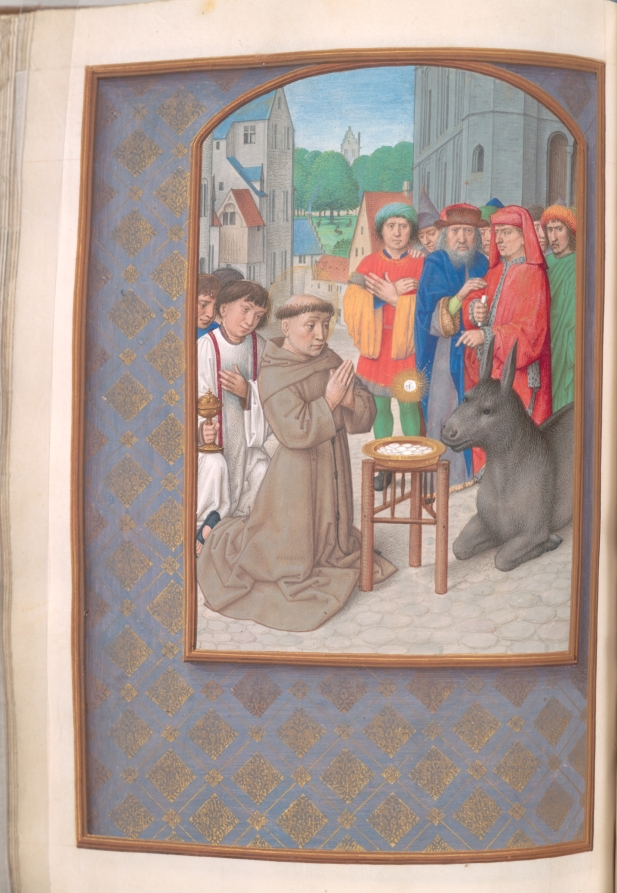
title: Hours of Queen Isabella the Catholic, Queen of Spain: Fol. 187v, St. Anthony of Padua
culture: Flanders, Ghent and Bruges, late 15th century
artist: Master of the First Prayerbook of Maximillian (Flemish, c. 1444–1519)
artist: and Associates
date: c. 1500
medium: ink, tempera, and gold on vellum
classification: Bound Volume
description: This manuscript was illuminated by a circle of at least five highly organized manuscript painters active in the Flemish cities of Ghent and Bruges. The principal illuminator was Alexander Bening, who painted the majority of the book's miniatures. Manuscripts produced by this circle of artists are renowned for the decoration of their borders, which typically feature a rich variety of realistically-painted flowers, birds, and butterflies. This prayer book, called a book of hours, was intended not for a cleric, but for the private devotions of a lay person-in this case, Isabella the Catholic, Queen of Spain (1451-1504). Isabella's coat of arms embellishes the book's frontispiece. It is unlikely that the book was commissioned by the Queen herself; rather, she probably received it as a diplomatic gift from someone courting her patronage, perhaps Cardinal Francisco Jimenez de Cisneros. A Franciscan friar, Jimenez was dependent upon Isabella for his advancement, first to the post of Queen's confessor in 1492, and then to Archbishop of Toledo in 1495.